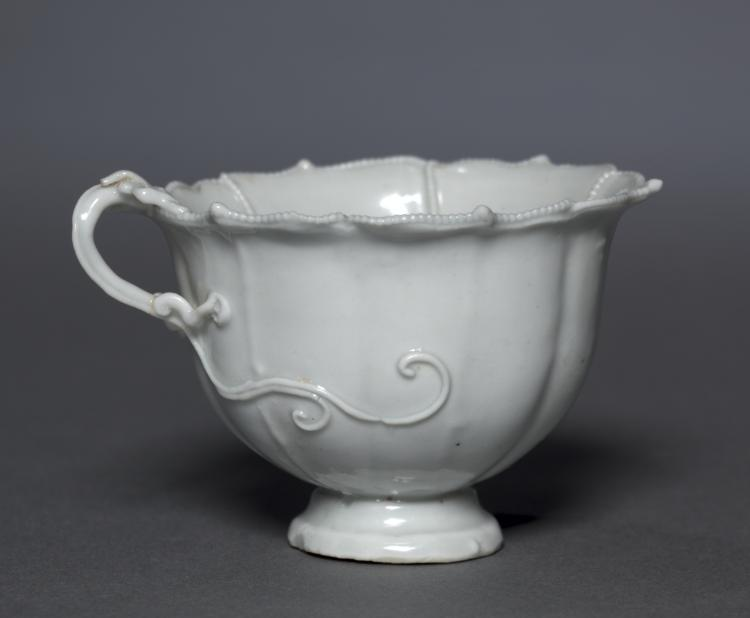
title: Fluted Cup with Dragon Handle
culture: China, Jiangxi Province, Jingdezhen kilns, Yuan dynasty (1271–1368)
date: early 1300s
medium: Glazed porcelain, Qingbai (bluish-white) ware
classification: Ceramic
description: Very thinly potted, the subtly lobed body of this cup is almost translucent. The thin, slightly opaque, light greenish glaze lends a sugary shine. Applied elements, including the handle, beaded borders, and sculptural floret, are constructed and glazed with the same materials as the body, providing a seamless blend of form and decorative embellishment. The result is an evocative reminder of slightly earlier silver cups, also created in the form of flowers. This pristine, natural construction is challenged, however, by the archaic dragon that acts as the handle. Borrowed from the decoration found on much earlier bronzes, this added form illustrates the eclecticism of the Yuan, the attempt to blend present vision with interest in the past.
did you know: Clay beading divides the cup's interior into six foliate panels with a six-petaled flower at the junction of the beaded lines.